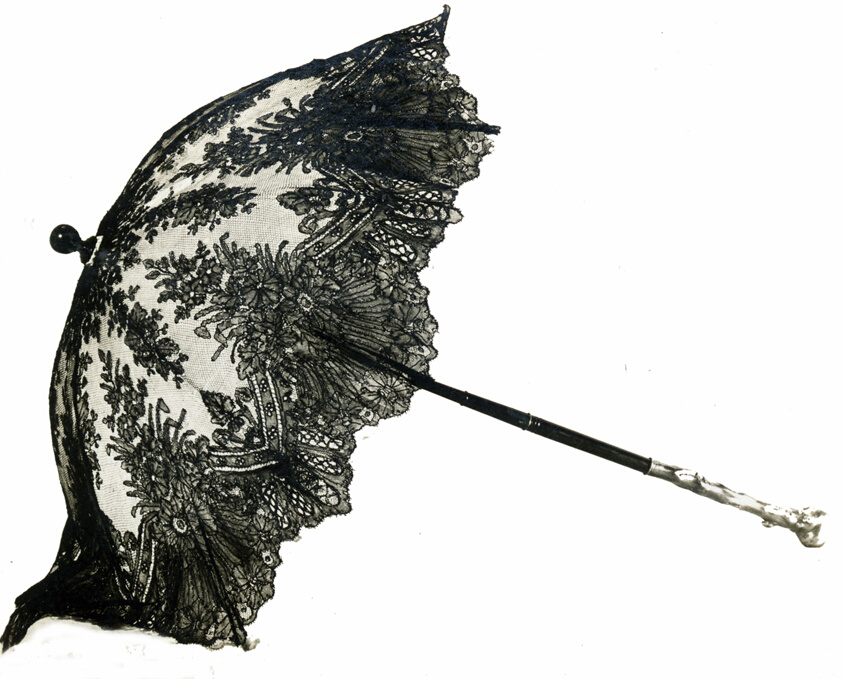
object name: Textile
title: Parasol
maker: Produced by Gorham Manufacturing Company (Probably Handle) (American, Founded 1831); France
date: c.1865/70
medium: Black Chantilly lace overy ivory taffeta. Lined with thin white silk; wood handle in form of rustic sitck; folding handle; steel tubing frame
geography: France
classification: textile; parasol - lace; costume accessory - parasol